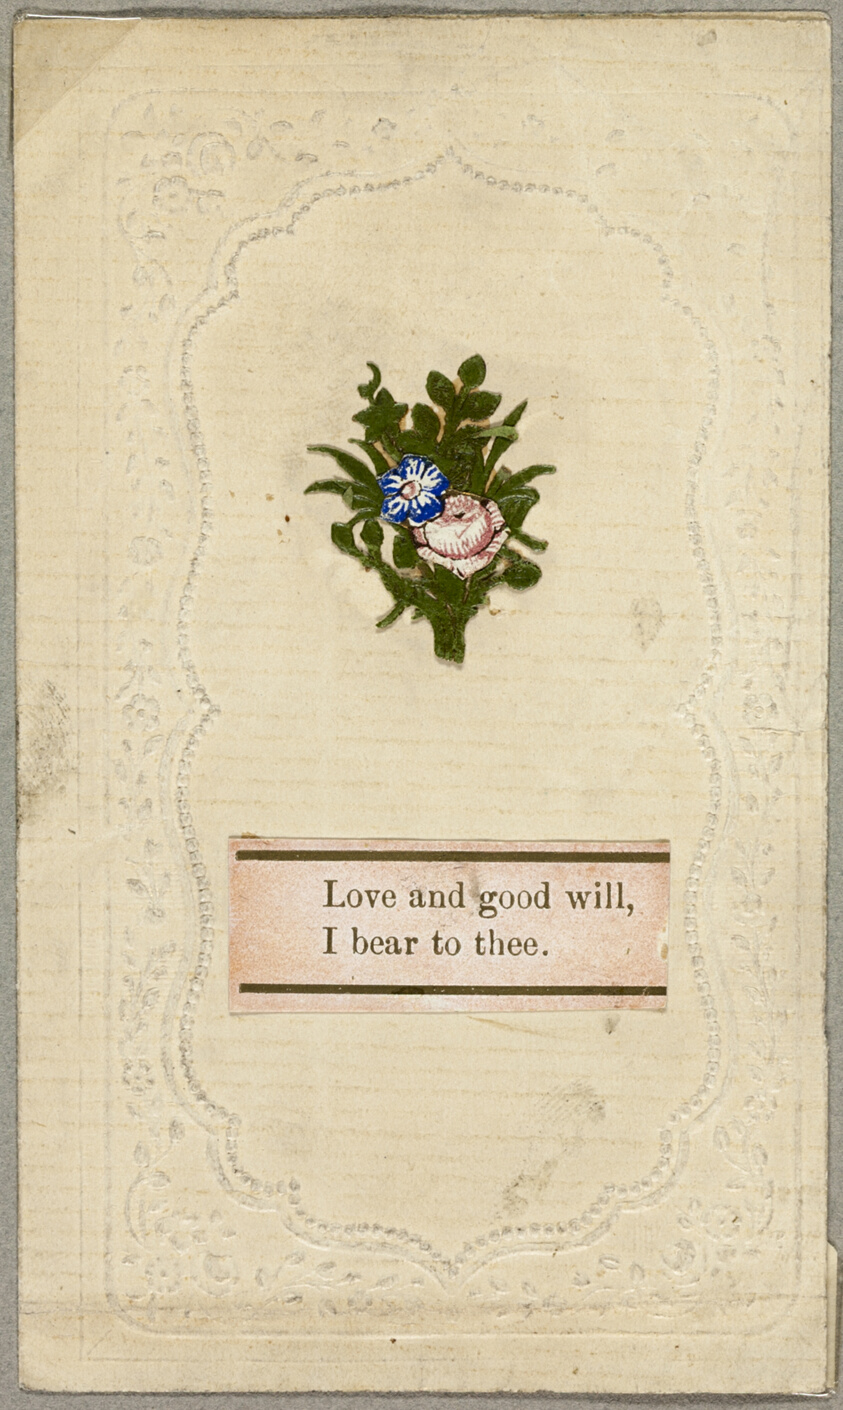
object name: Drawing and Watercolor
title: Love and Good Will, I Bear to Thee (Valentine)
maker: Unknown Artist; American or English, 19th century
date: c. 1830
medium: Collaged elements on embossed cream wove paper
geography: United States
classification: collage; valentine; prints and drawing; paper